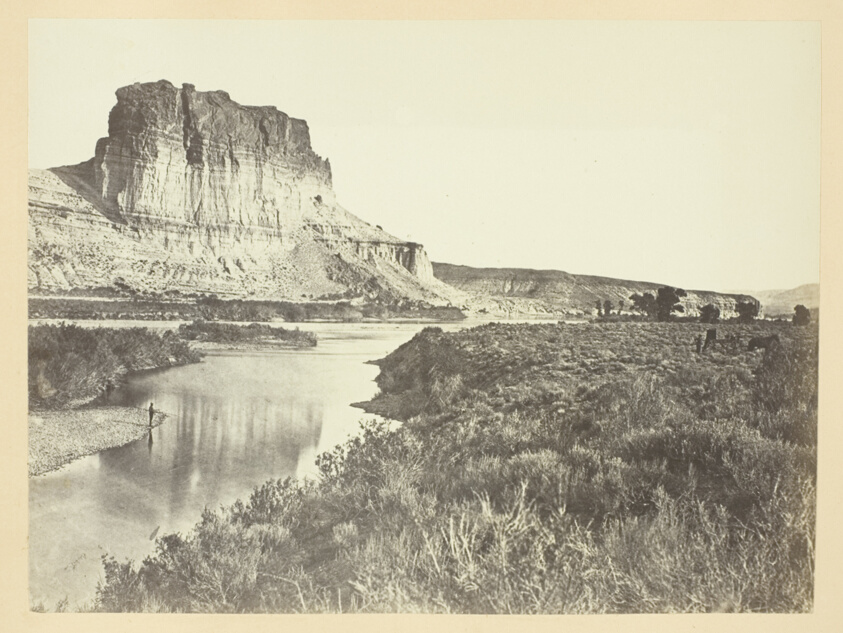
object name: Photograph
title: Castle Rock, Green River Valley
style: 19th century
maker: Andrew J. Russell; American, 1830–1902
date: 1868/69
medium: Albumen print, pl. XII from the album "Sun Pictures of Rocky Mountain Scenery" (1870)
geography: United States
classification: photograph; albumen silver print; photography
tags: Collected by Hugh Edwards, landscapes